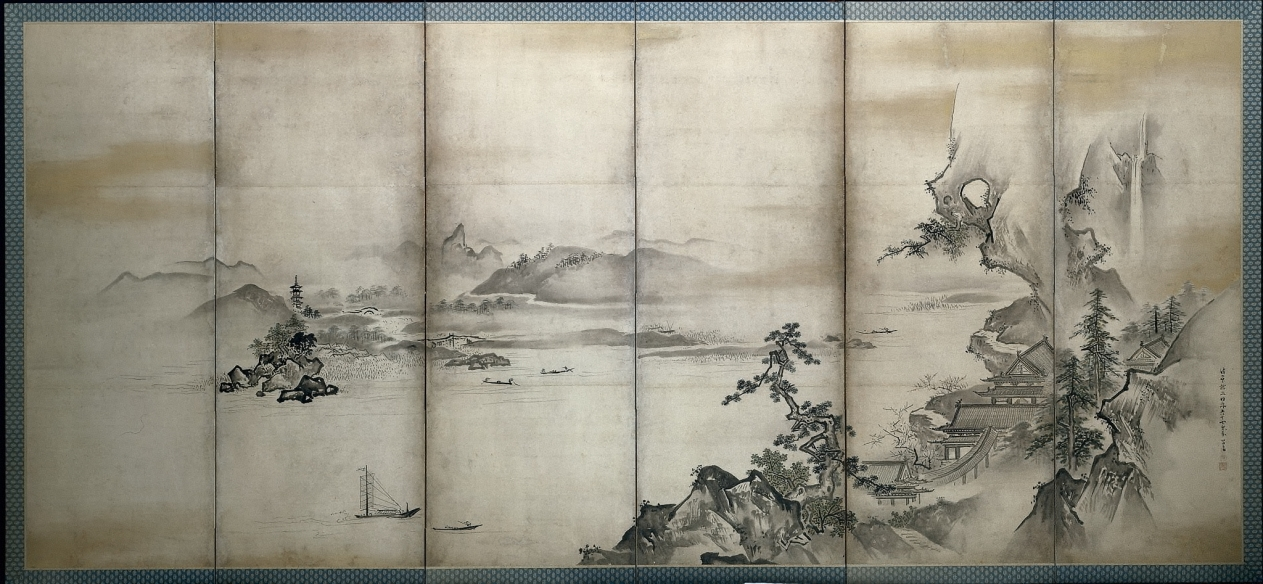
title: The Four Seasons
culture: Japan, Edo period (1615–1868)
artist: Kano Tan’yū (Japanese, 1602–1674)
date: 1668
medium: Six-panel folding screen, ink and slight color on paper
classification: Painting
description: Tan'yū's skills were honed early within the regimen of the Kano family's painting studio. His grandfather, Eitoku (1543–1590) was the Momoyama period's most sought-after painter, a champion of colorful, large-scale painting compositions who worked for several of the country's most powerful leaders. When the young Tan'yū was summoned to Edo in 1617 by the shogun to become a member of the new capital's official painting studio, few opportunities to work on similarly ambitious projects existed. Yet by the end of his career, Tan'yū had supervised the execution and installation of linked mural painting compositions in several of Japan's most prestigious residences and castles. As an official court painter to the first shogun, Tokugawa Ieyasu (reigned 1603–5), and then his successors, Tan'yū appears to have successfully juggled his official duties with private activities as a teacher, as the era's leading connoisseur of classic Chinese and Japanese painting, and as a practicing artist. His surviving compositions as well as thousands of sketches far surpass the oeuvre of any of his contemporaries. While studio assistants surely contributed to his oeuvre, just as later imitators consciously confused his accomplishments, a clearer image of the painter has emerged in recent years that better conforms with his contemporary acclaim as recorded in seventeenth- and eighteenth-century documents. Tan'yū can now be seen as an artist adept in virtually all traditional ink painting subject matter, which he often presented in novel interpretations. Equally important are his rare screen (byōbu) compositions executed in a pure yamato-e manner with vivid mineral pigments on a gold-foil background. This pair of byōbu presents Tan'yū's more orthodox approach to academic ink painting methods embracing Chinese themes that had been interpreted by numerous Japanese ink painters over the centuries. Thus a typical view of residences and human activities set along the shores of an impressive river (or lake) is enlivened by the Japanese proclivity for including seasonal references. Proceeding from right to left, the viewer passes sequentially from spring to the snow-laden branches of winter. Tan'yū lends considerable atmospherics to the panorama in his use of misty cloud banks, frequently set off by sharp, darkened ink lines or whole areas of ink washes of variegated tonalities. The spring and summer views are particularly notable in this regard, as is the presence of the artist's signature on both byōbu, attesting to their completion in Tan'yū's sixty-seventh year (1668)—50 years after he left Kyoto for the capital, and 30 years following his adoption of the artist name "Tan'yū" (in 1635). From 1622, when he began work on the mural paintings for Edo castle (the shogun's formal residence), through the completion of the painting cycle in 1636 for the Tokugawa family mausoleum in Nikkō to the north of Edo, Tan'yū's skills as head of an accomplished painting studio as well as a master painter found their most impressive expression in large-scale compositions. In 1638 he received the honorary Buddhist title Hōgen (Eye of the Law). It is intriguing therefore that relatively few independent byōbu paintings from the master's hand survive, particularly documented early works.